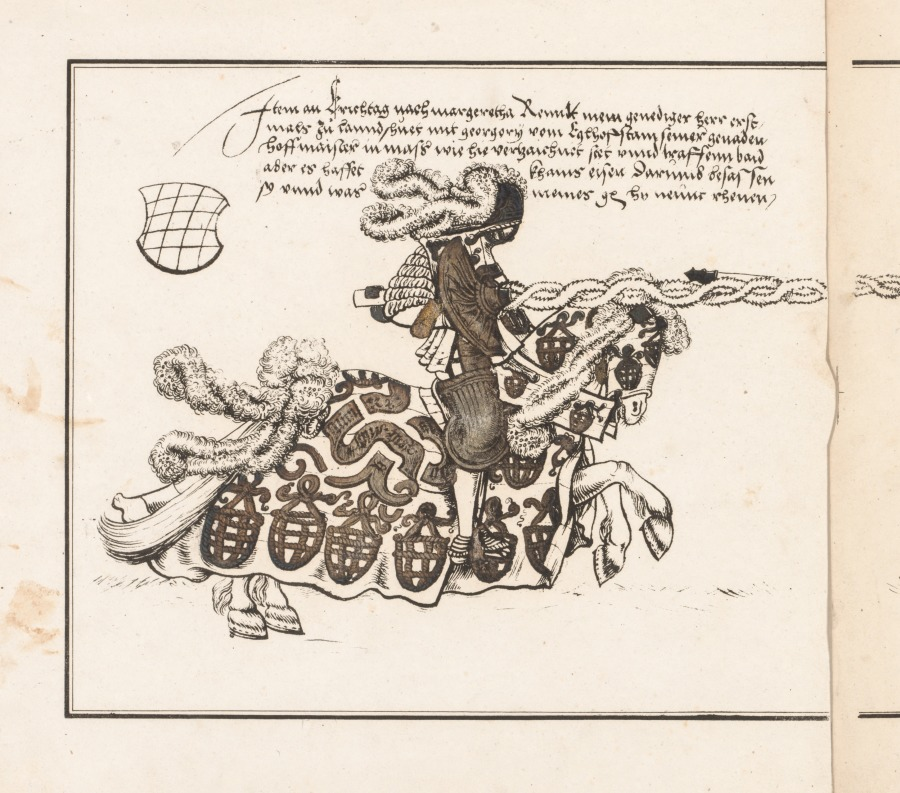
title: Book on Tournaments: Jouster Facing Right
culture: Germany, 19th century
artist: Theobald Senefelder (German, 1777–1846)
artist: and Clemens Senefelder (German, 1778–1813)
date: 1817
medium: lithograph, hand colored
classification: Print